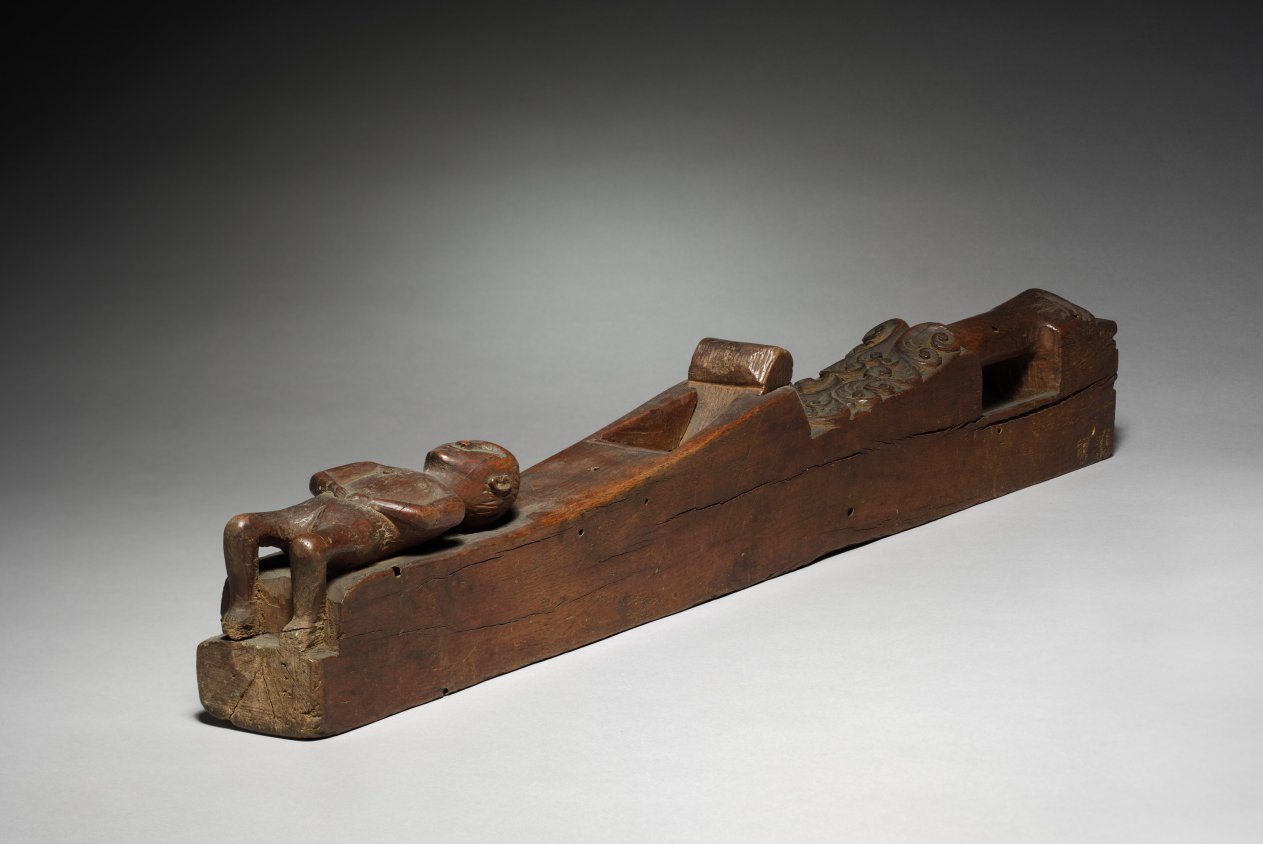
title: Plane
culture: Germany or Italy, 17th century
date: 1600s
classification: Tool